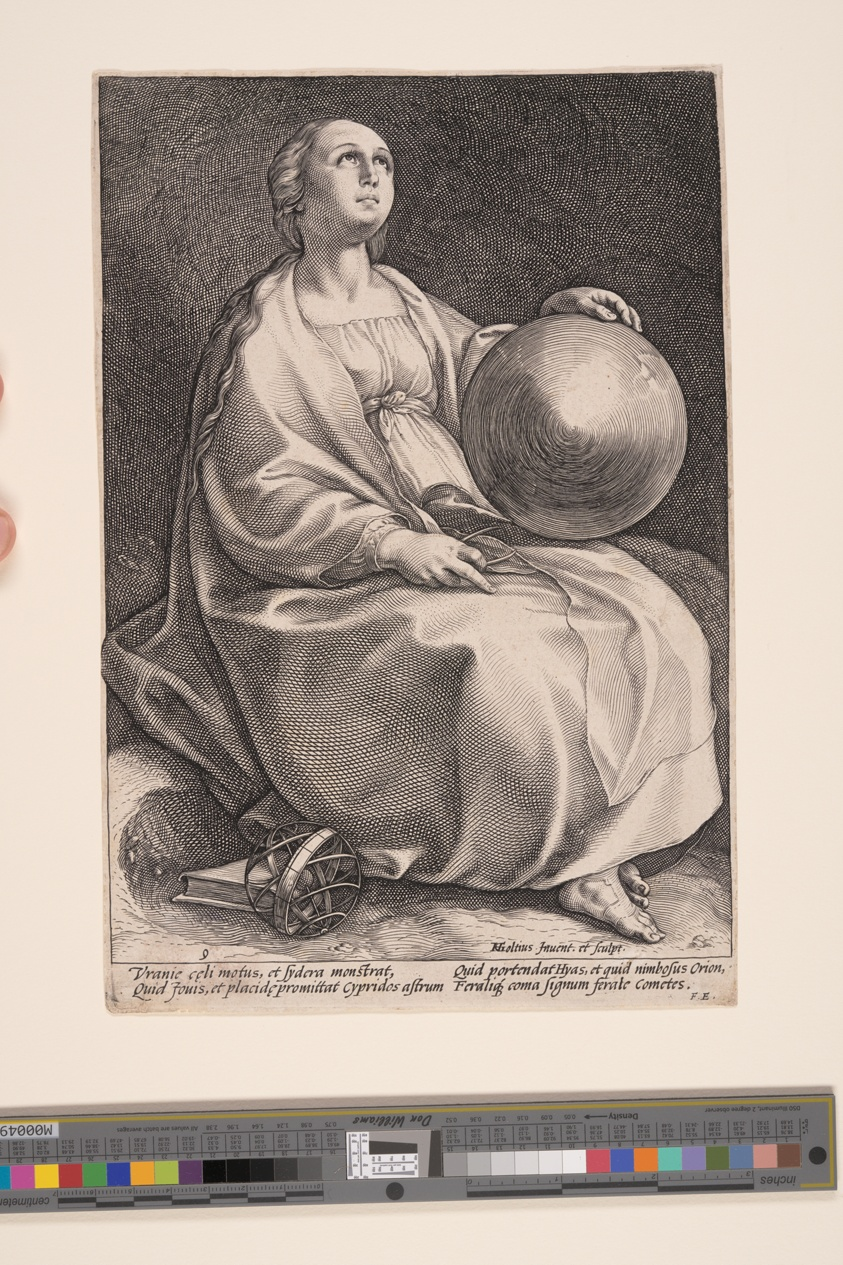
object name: Print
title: Urania, The Muse of Astronomy, from The Nine Muses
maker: Hendrick Goltzius (Dutch, 1558–1617)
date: 1592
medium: Engraving on laid paper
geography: Netherlands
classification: print; engraving; paper; prints and drawing